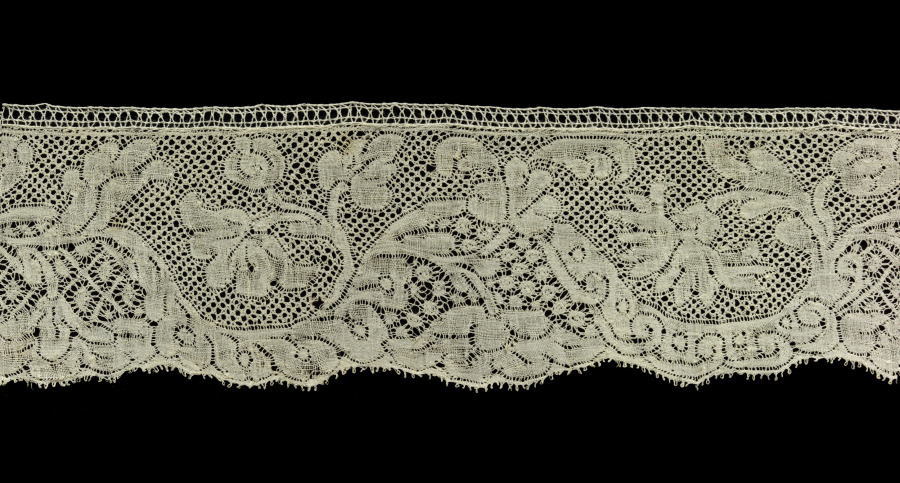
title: Lace Edging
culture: Belgium, Binche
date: 1700s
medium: Linen: bobbin lace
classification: Lace